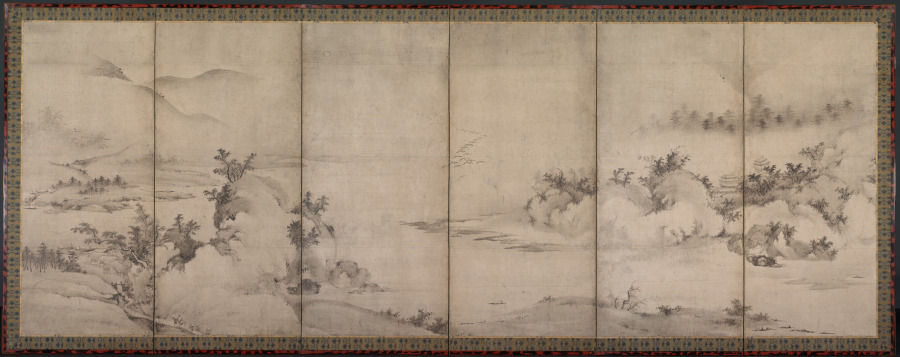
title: Landscape with Motifs from the Eight Views of Xiao-Xiang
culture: Japan, Momoyama period (1573–1615)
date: late 1500s–early 1600s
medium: One of a pair of six-panel folding screens; ink on paper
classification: Painting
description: This screen is from a separated pair depicting the Eight Views of Xiao-Xiang, a Chinese painting and poetry theme. Read in the manner customary for Japan, from right to left, the motifs here are “Evening Bell from a Mist-Shrouded Temple,” “Wild Geese Descending to a Sandbar,” “Sunset Glow over a Fishing Village,” and “Mountain Market in Clearing Mist.” The “crab-claw” style of the trees, in which the branches resemble the curved claws of a crab, and the stippling effect indicate a familiarity with Korean interpretations of Chinese painting styles of the Song dynasty..